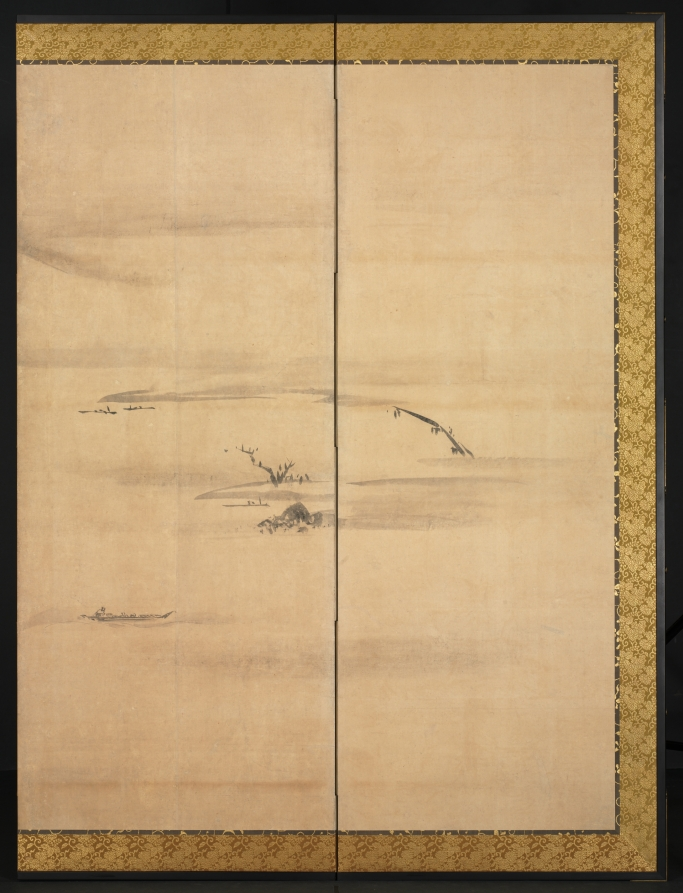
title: Eight Views of the Xiao and Xiang Rivers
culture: Japan, Edo period (1615–1868)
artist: Watanabe Shikō (Japanese, 1683–1755)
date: 1700s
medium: Six-panel folding screen; ink on paper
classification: Painting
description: Watanabe Shiko enjoyed a versatile and successful career, as well as a privileged upbringing, in Kyoto. His surviving work indicates a capacity to diligently study, master, and then interpret several painting techniques—each of which varies considerably in appearance. These byobu (folding screens), for instance, reflect training in the Kano school idiom that favored a monochromatic ink palette, vigorous brushwork, and traditional Chinese—rather than Japanese—subject matter. Shiko rendered this scenery in a particularly expansive manner, suggesting the vastness of China's topography relative to Japan's. Frequent visitors to the museum will recall that Shiko also painted the collection's favored pair of byobu, the Irises (CMA 1954.603).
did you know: This screen forms a pair with CMA 1968.267.